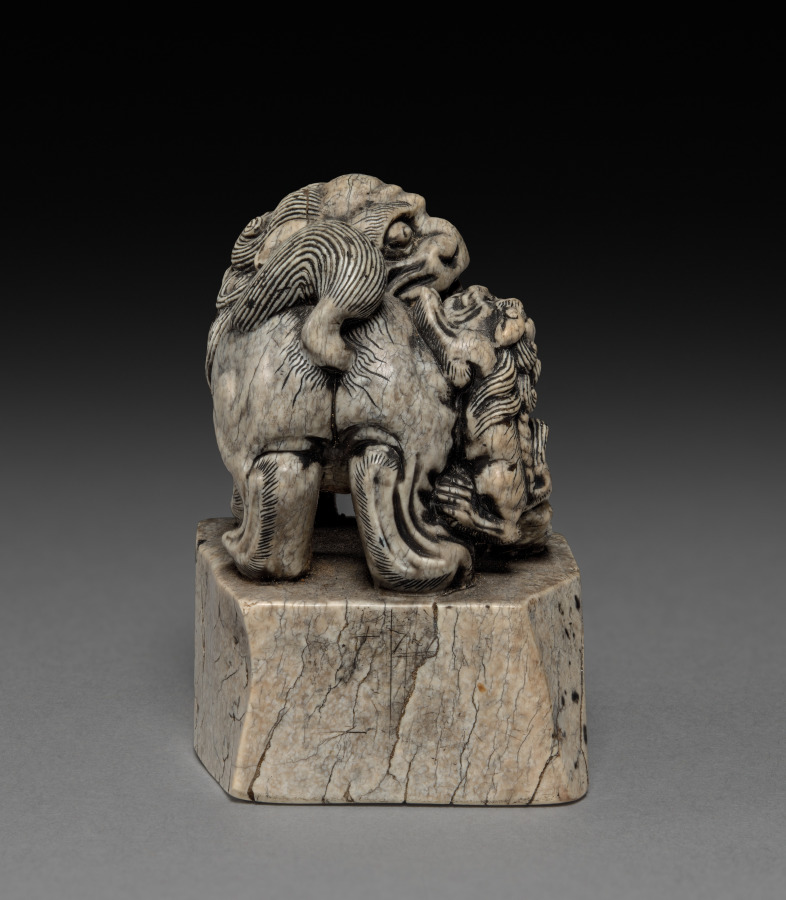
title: Seal: Lion and Cub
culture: China, Qing dynasty (1644-1911)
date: 1700s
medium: stone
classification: Stone